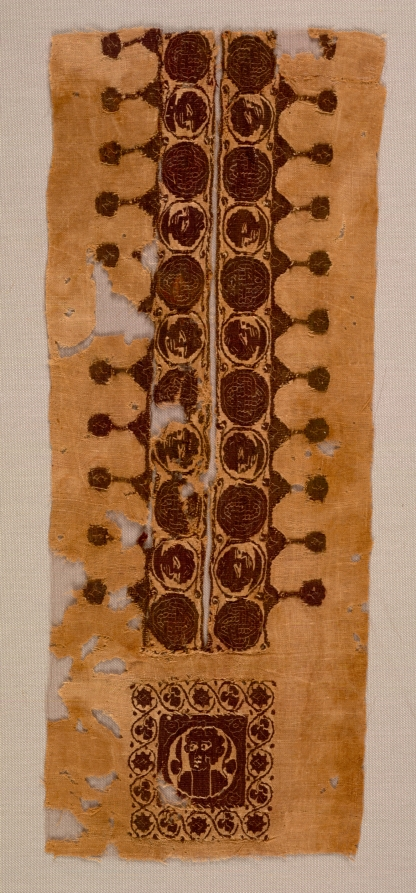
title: Neck and Shoulder Decoration from a Tunic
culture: Egypt, Byzantine period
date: late 400s - 500s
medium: plain weave with slit-tapestry weave and supplementary weft wrapping; dyed wool, undyed linen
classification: Textile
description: This tunic fragment with a straight neck opening in the center and one surviving shoulder square may have symbolically protected the wearer from danger. This is suggested by interlacing knots. These delicate decorations in small deep purple discs alternate with human busts in roundels.